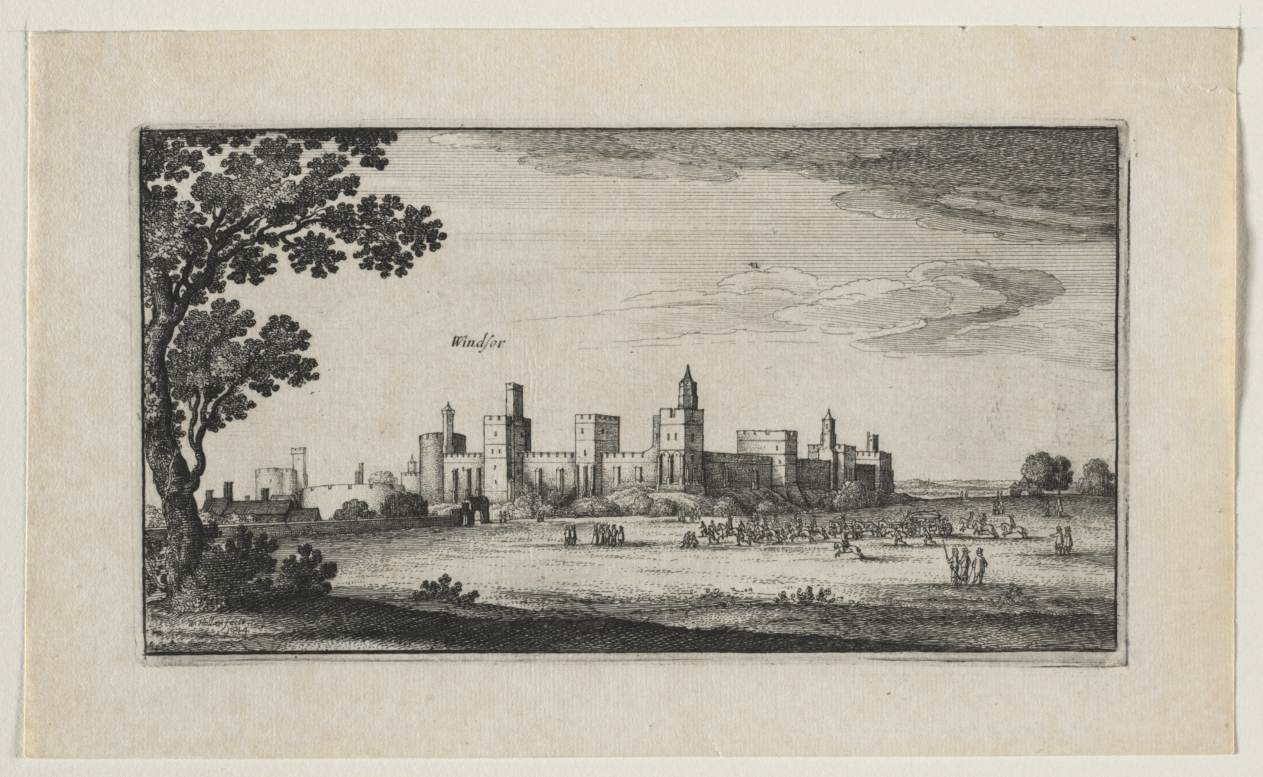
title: Windsor Castle from the Southeast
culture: Bohemia, 17th century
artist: Wenceslaus Hollar (Bohemian, 1607–1677)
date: 1644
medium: etching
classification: Print